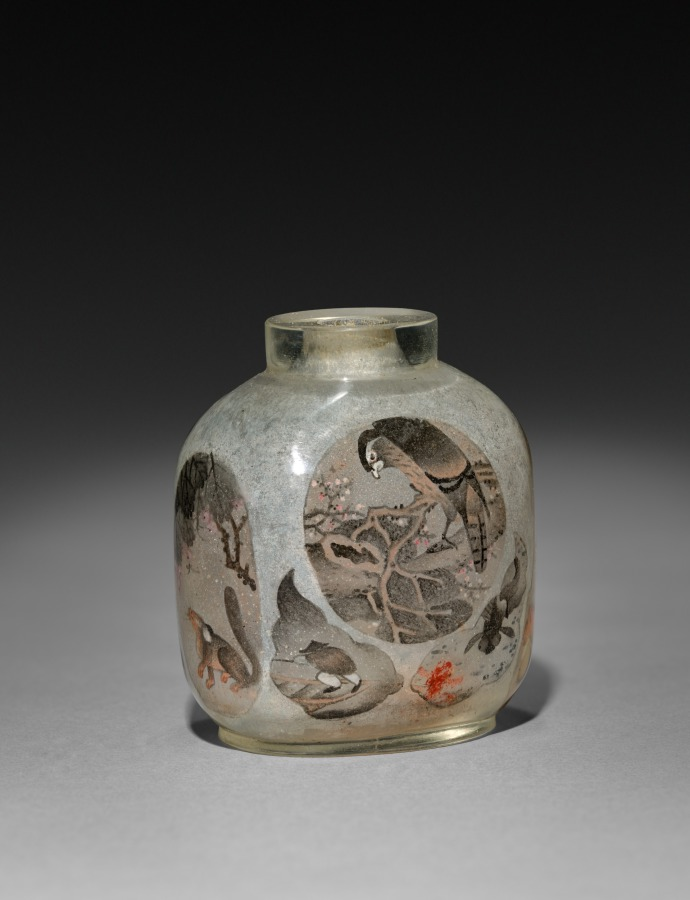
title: Snuff Bottle with Stopper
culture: China, Qing dynasty (1644–1911), Qianlong reign (1736–95)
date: 1736–95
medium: crystal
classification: Stone